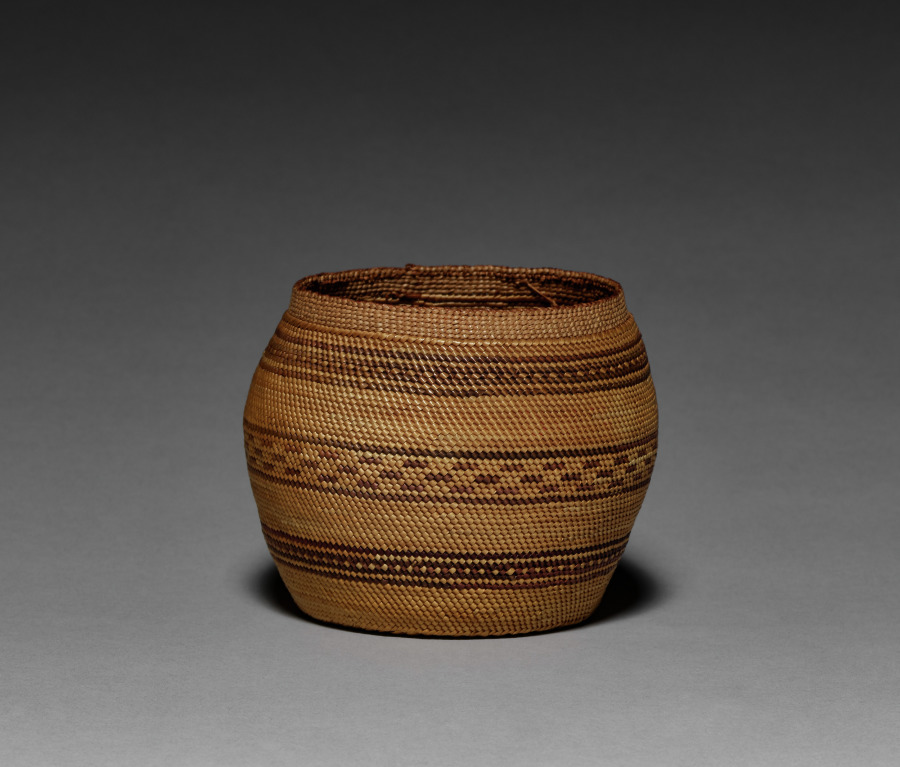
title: Bowl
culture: Northwest Coast, Vancouver Island, late 19th century (?)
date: c. 1875–1900?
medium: twined grass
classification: Basketry